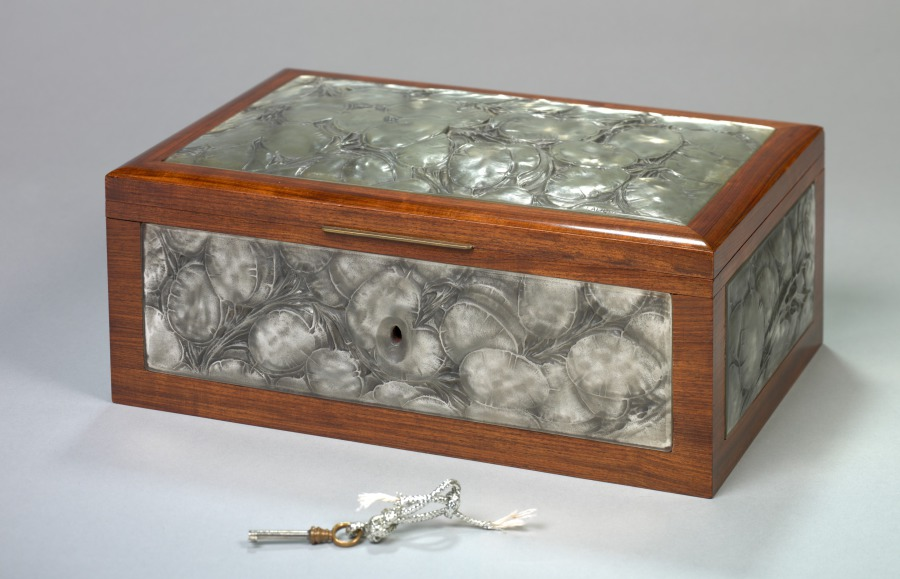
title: Monnaie du Pape Coffer (coffret)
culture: France, 20th century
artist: René Lalique (French, 1860–1945)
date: c. 1914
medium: wood, bombé glass panels with gray patina, metal key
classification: Mixed Media